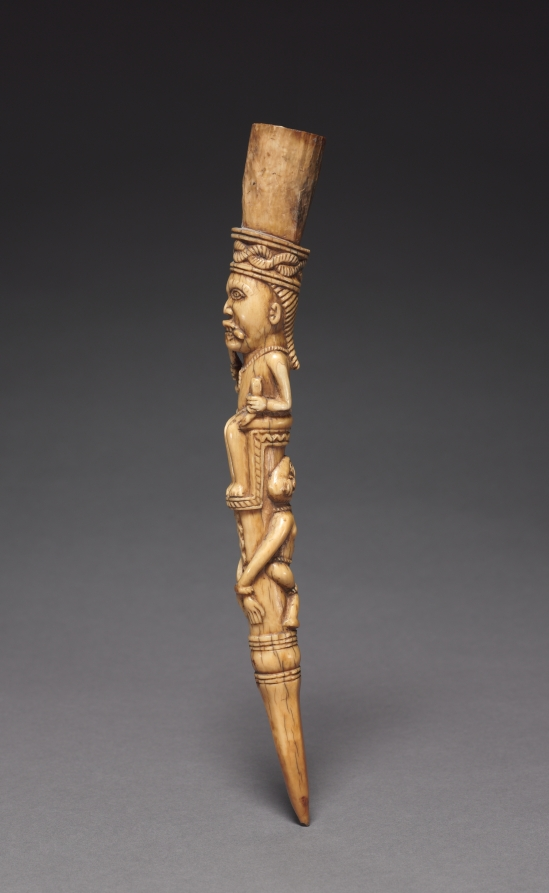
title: Scepter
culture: Africa, Central Africa, Democratic Republic of Congo (most likely), Cabinda, or Republic of Congo, probably Kongo-style (Yombe sub-group) carver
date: late 1800s–early 1900s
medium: ivory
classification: Implements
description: Used by male chiefs, ivory scepters were symbols of status indicating worldly authority and supernatural influence. The use of ivory implies that the chief has the fatal power of an elephant. The figurine shows a chief enthroned on the bound body of a criminal destined for such a death. A medicine package would have been enclosed within the container extending from the figure’s head, bestowing supernatural powers.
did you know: Scepters often represent the chief sitting atop a bound prisoner or attribute to a violent death.